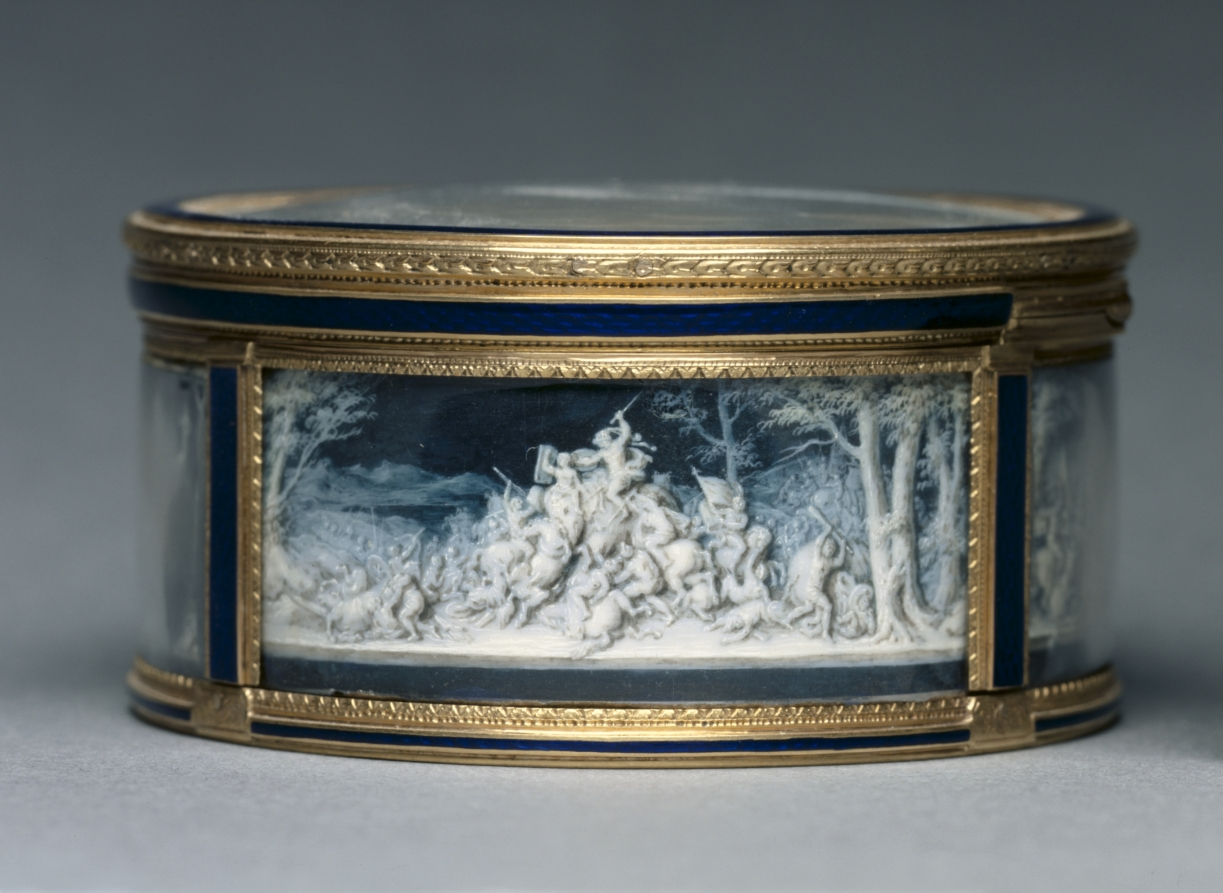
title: Snuff Box (Tabatière)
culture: France, 18th century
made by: Pierre Marie Gault De Saint-Germain (French, 1754–1842)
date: 1779–80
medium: gold and enamel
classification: Miscellaneous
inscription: [Warden's mark for Paris, 1779-1780, inside bottom; inside cover]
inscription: [Illegible maker's mark, inside bottom; inside cover]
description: Decorated with images derived from ancient Greek and Roman history in the style of cameos, intricately carved gemstones, this box evokes the rising neoclassical imagery in France. The scenes on the box recount several key events in the life of Alexander the Great. The enameled works were inspired by a series of prints by Sébastien Leclerc which drew from a series of paintings by Charles Le Brun.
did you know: The original series painted by Charles Le Brun, The Battles of Alexander (Les Batailles d’Alexandre) (1600s), was commissioned by King Louis XIV of France.